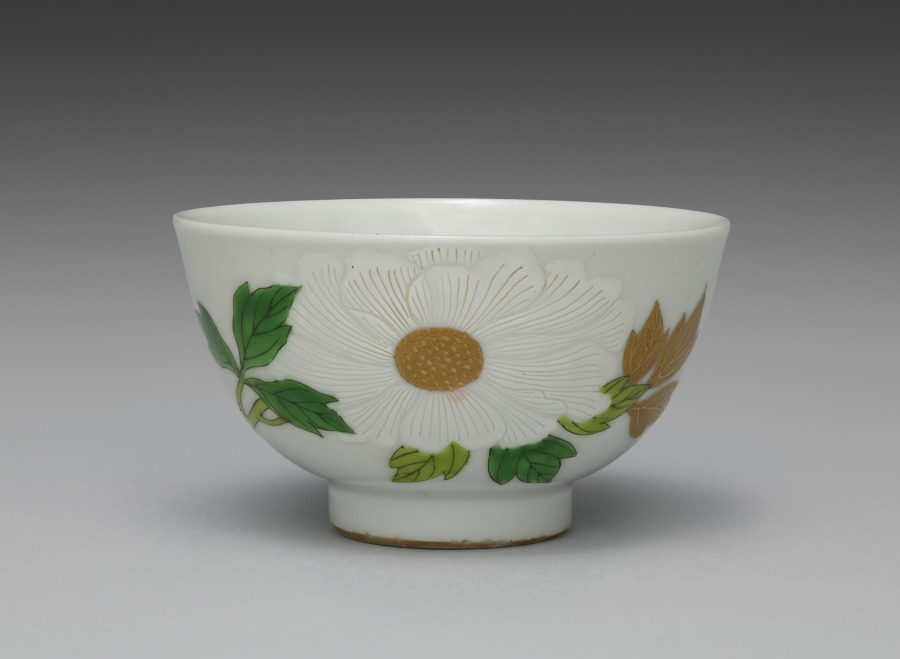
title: Teabowl from Teabowls with Peony and Crabapple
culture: Japan, Meiji period (1868–1912)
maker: Seifū Yohei III (Japanese, 1851–1914)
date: 1893–1914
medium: One from a set of five teabowls; porcelain with underglaze and overglaze color enamels and gold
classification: Ceramic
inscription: 清風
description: Overglaze color enamels are generally called iro-e (literally “color picture”) in the terminology customarily used for porcelain decoration of the Edo period. This set of teabowls is a fine example of Yohei III’s skilled use of the technique, which is identified on this set’s box lid with the alternate phrasing “porcelain with color painting” (jisaiga). Distinct from the way overglaze colors were used in Kakiemon ware from Arita, his designs and applications show a consciousness of porcelain decoration of the Qing dynasty. Here, he combines Chinese models with a sensibility taken from Kyoto ware precedents, including painting with powdered gold (kinrande). The colors used in the bowls are as follows: blue, black, gold, white, light green, green, and pink. The blue appears only inside the footring, as a double band of underglaze color. The black iron, used for stems and leaf veins, is painted over the glaze. The gold, also painted over the glaze, is used for leaves and the centers of flowers, for solid, glossy lines defining detail, or as a semimatte ground. The white of the peony flower is built up to a low relief over the glaze. Yohei has incised lines of varying widths into the pigment, carving away to the bowl’s surface, to differentiate individual petals and their rippled shapes. The light and dark greens, as well as the pink, are painted over the glaze. Of note is how Yohei has first used thinly applied lines of light green to draw the plum branch before applying the opaque iron black. For the plum buds and flowers, he has used a diluted pink with an opaque pink for outline, both over the glaze. In his later works, Yohei used pink both over and under the glaze in a manner similar to underglaze blue, and it can be challenging in some cases to discern which technique he has used. A lidded container in a private collection has a similar design but is augmented with the inclusion of white and purple magnolia blossoms. In contemplating the original decorative program of a set, of which these teabowls may have been a part, it is worth considering that perhaps not all objects included the full range of motifs. In such cases, the composition of the individual object may be best understood within the context of the extended ensemble. Here, the delicate pink plum on one side of the bowl seems slightly unbalanced with the bold white peony on the other, but when seen with other objects with the magnolia and its additional colors and shapes, it is possible to imagine a set with a complex, balanced design across multiple pieces.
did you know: "Seifū" is inscribed on the base in a double band of underglaze color.